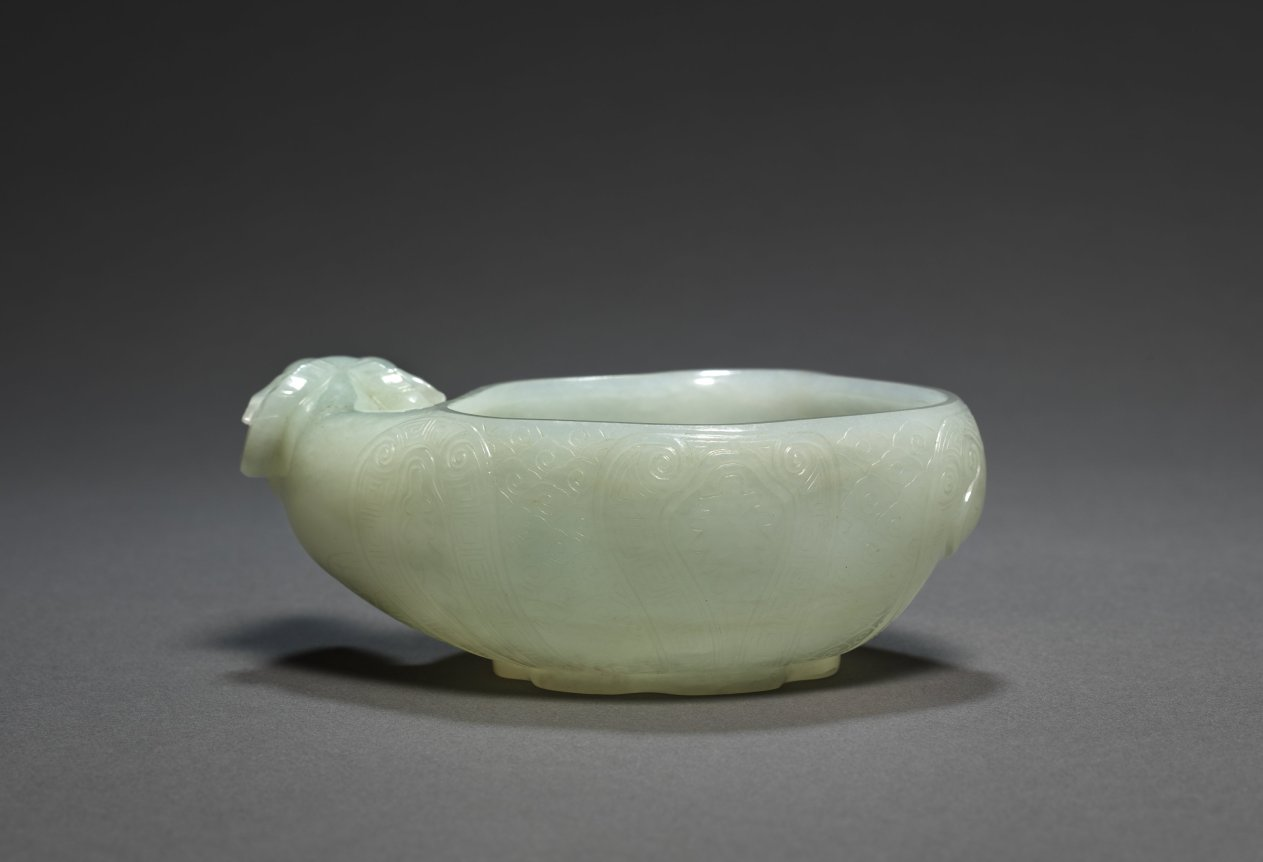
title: Waterpot with Ram's Head Spout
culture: China, Qing dynasty (1644–1911)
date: 1700s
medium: white jade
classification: Jade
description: Pure white jade like this, known to the Chinese as "mutton-fat" jade, is particularly prized. The white color has been the preferred shade of jade throughout the ages. The radiance and purity are linked metaphorically to the virtues of the ideal Confucian scholar. The translucent quality of the jade has moral and poetic allusions attached to it.